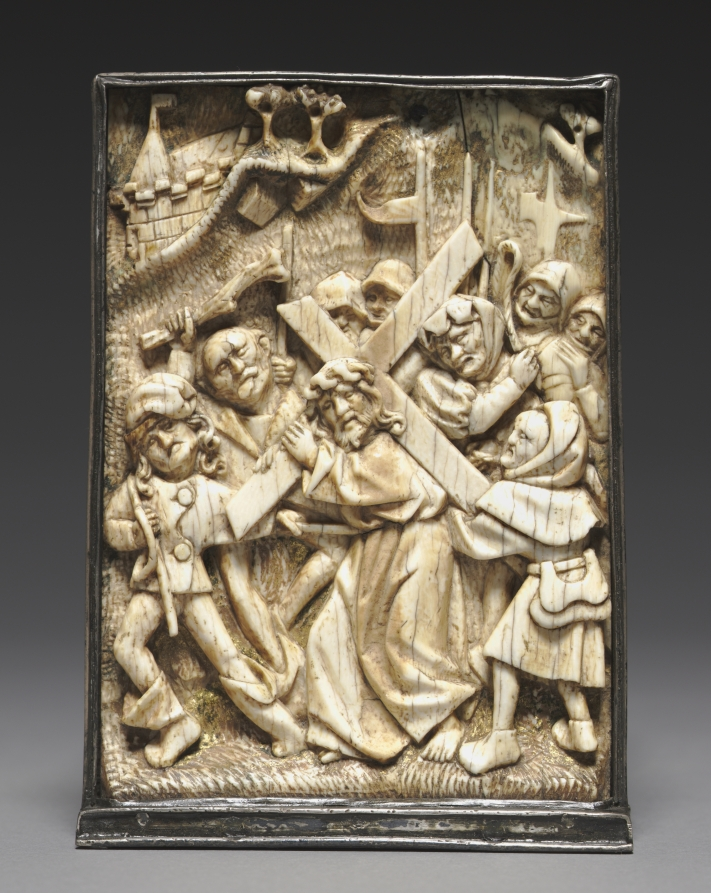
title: Plaque: Christ Carrying the Cross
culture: Germany, Lower Rhine, late 15th Century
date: c. 1480–1500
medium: ivory with traces of color and gold, mounted in silver frame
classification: Ivory